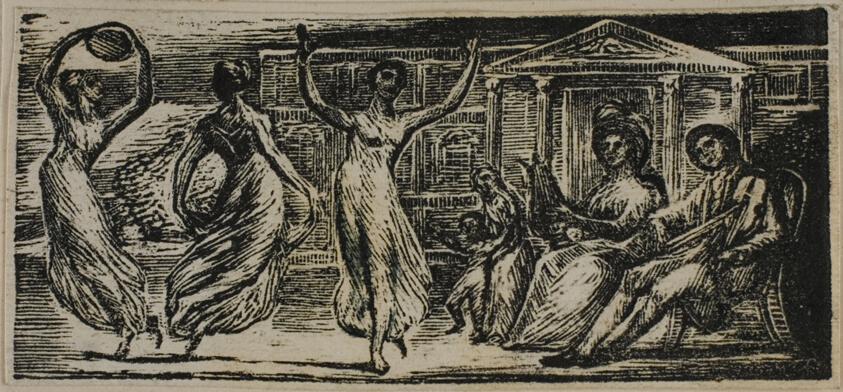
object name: Print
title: Menalcas Watching Women Dance, from The Pastorals of Virgil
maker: William Blake (English, 1757-1827)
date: 1821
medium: Wood engraving on off-white wove paper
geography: England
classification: wood engraving; print; prints and drawing; paper